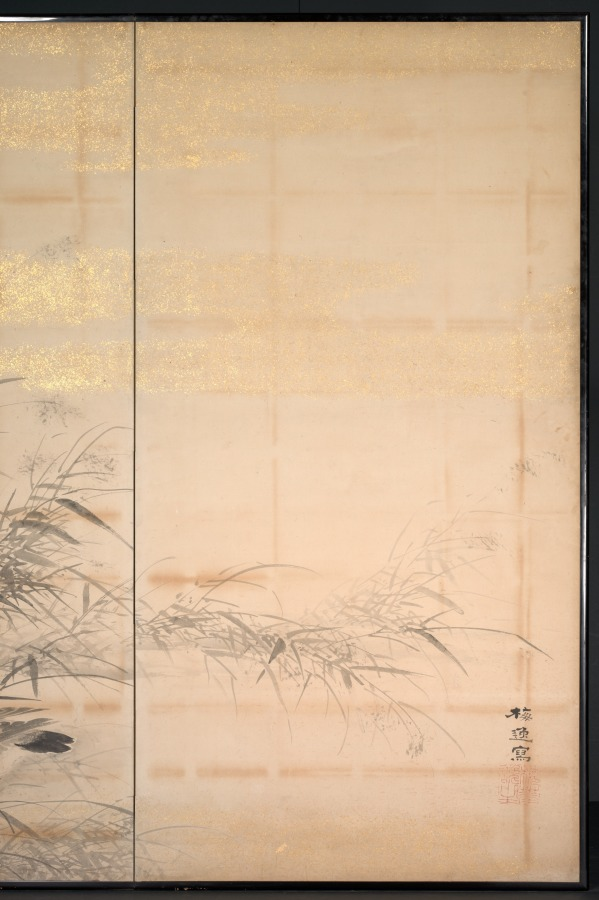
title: Geese, Reeds, and Water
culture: Japan, Edo period (1615–1868)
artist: Yamamoto Baiitsu (Japanese, 1783–1856)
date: 1800s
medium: One of a pair of four-panel folding screens; ink, color, and cut gold foil on paper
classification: Painting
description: This byōbu composition differs from most in that it comprises two four-panel screens, rather than two six-panel units. Since the current mounting is modern, it is impossible to determine whether its present configuration represents its original design. Some panels may have been removed to help the screens better fit into a modern interior space. Baiitsu worked almost exclusively in monochromatic ink tones and favored classical Chinese painting themes.